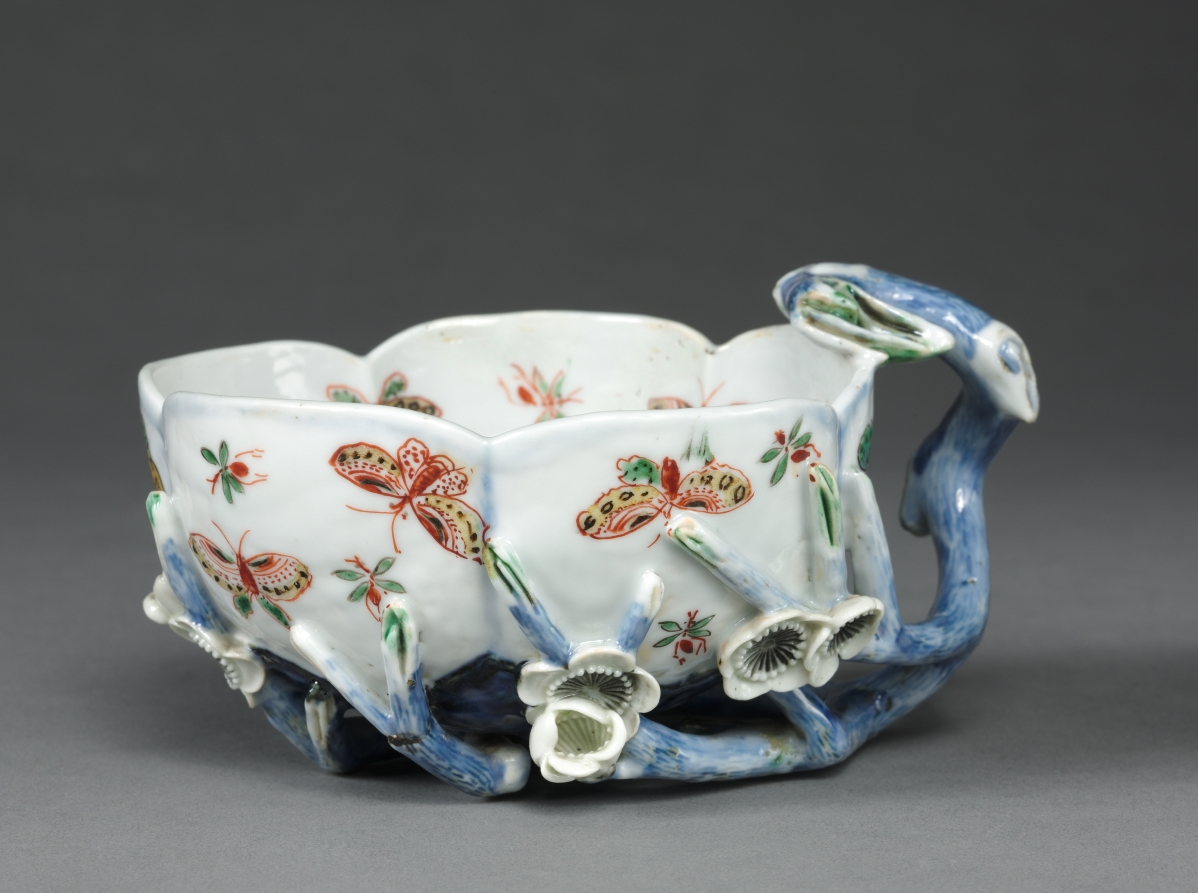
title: Plum Blossom Cup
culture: China, Jiangxi province, Jingdezhen kilns, "Transitional period", Ming dynasty (1368-1644), Tianqi reign (1621-1627)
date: 1621–27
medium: porcelain with underglaze blue and wucai (five color) overglaze enamel decoration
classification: Ceramic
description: This porcelain cup is considered to have been made in the "Transitional period," a term used to define the period between about 1620 and 1683 when official kilns in Jingdezhen were no longer under imperial supervision due to the transition from the Ming to the Qing dynasties.